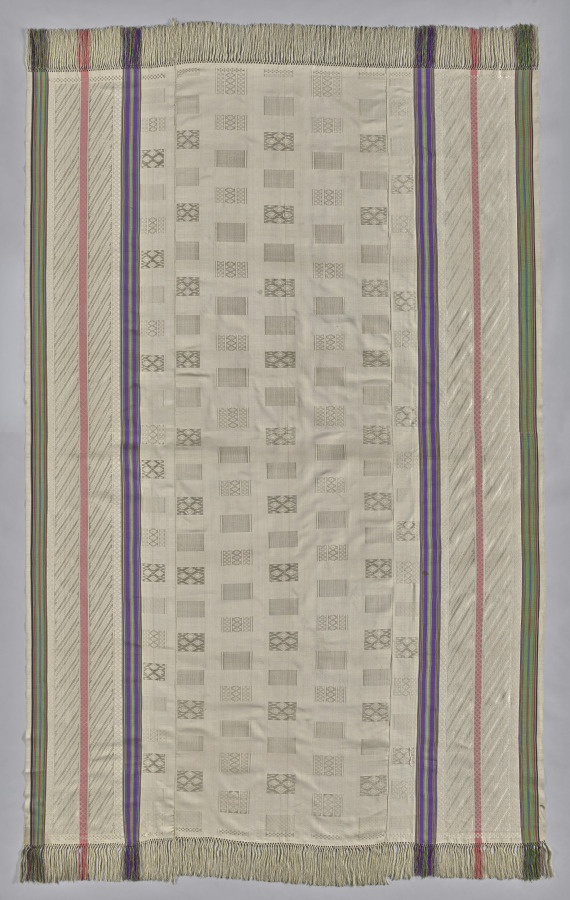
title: Wrapper (Lamba Akotifahana)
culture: Madagascar, Merina Kingdom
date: 1860–90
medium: silk (Bombyx mori and Borocera cajani)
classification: Textile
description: A lamba is an untailored textile worn by all ages, classes, and genders across much of Madagascar. Woven from shining Bombyx mori silk, the lamba akotifahana takes its name from the weft-float motifs (akotifahana) that adorn it. Once the color of commoners and the enslaved, when Christianity became the state religion in 1869, elite churchgoers preferred white silk lambas. The rows of knotted fringe reflect Malagasy taste for Chinese-made “Manila shawls.”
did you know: A shining lamba like this was wrapped around the shoulders over tailored clothing like a suit or dress.